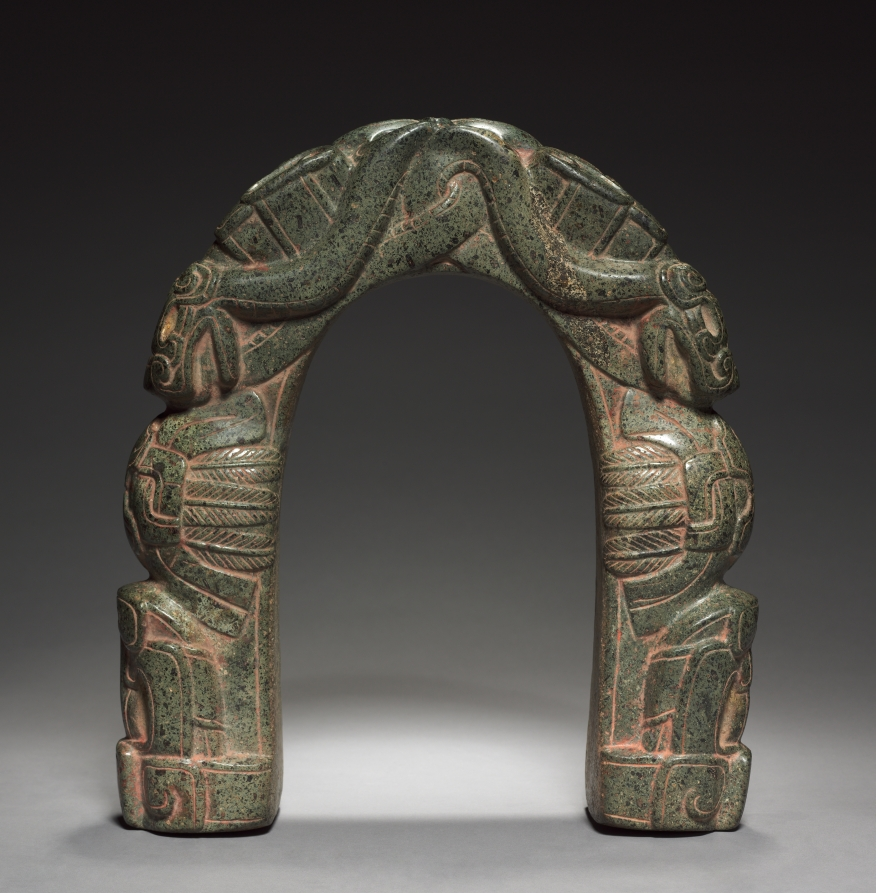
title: Ballgame Hip Protector (Yoke)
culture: Mexico, Gulf Coast, Classic Veracruz style (600-1100)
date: 600–900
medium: greenstone, pigment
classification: Sculpture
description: U-shaped ballgame sculptures imitate the shape of belt-like protectors, perhaps made of wood and padding, worn to shield ballplayers from injury when they returned the solid rubber ball from their hips. This fine example embodies a major theme of the ballgame: the connection between fertility and death. It is made of greenstone, a precious material that through its color symbolizes the lush burgeoning of nature after the rainy season. The imagery, however, is menacing: a monstrous head snarls from the curve, and human skulls appear on the sides.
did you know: The ballgame was a team sport played on specially constructed rectangular courts and involved striking a large solid rubber ball without using your hands.